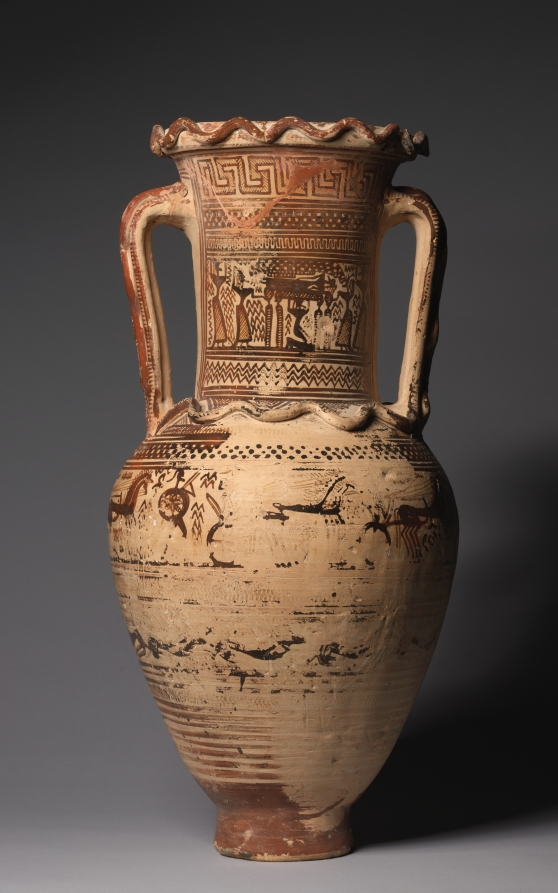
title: Geometric Neck-Handled Amphora (Storage Vessel): Prothesis (Laying out of Corpse), Mourners, Chariots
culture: Greek, Attic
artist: attributed to Workshop of Athens 894 (Greek, Attic, Late Geometric llb)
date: c. 720–700 BCE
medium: ceramic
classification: Ceramic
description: This neck-amphora bears multiple forms of decoration related to funerary ritual. On the neck panels, mourners beat their heads or tear out their hair. Some surround a bier, a platform where the body of the deceased lies beneath a checkered cloth. Further down, a procession of two-horse chariots moves around the vase, whether headed to the cemetery or the battlefield. The snakes applied to the handles, neck, and rim may all allude to the underworld.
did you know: The better-preserved side of this vase is actually its reverse.